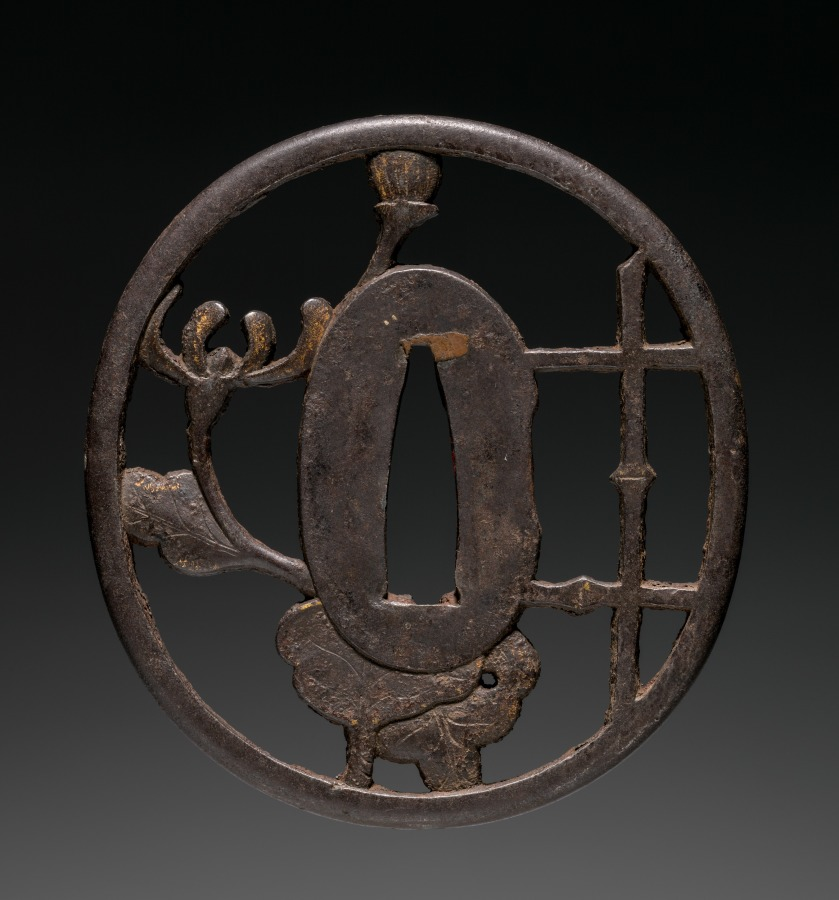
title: Sword Guard (Tsuba) with Fence and Flower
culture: Japan, possibly Edo period (1615-1868)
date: c. 1615–1868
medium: iron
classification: Arms and Armor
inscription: 武州住正房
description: An inscription on one side of this sword guard states that the maker went by the first name of Masafusa, and worked in the historical province of Musashi. This area includes modern Tokyo.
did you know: The signature could be that of Itō Masafusa, or added later by someone else as an attribution.